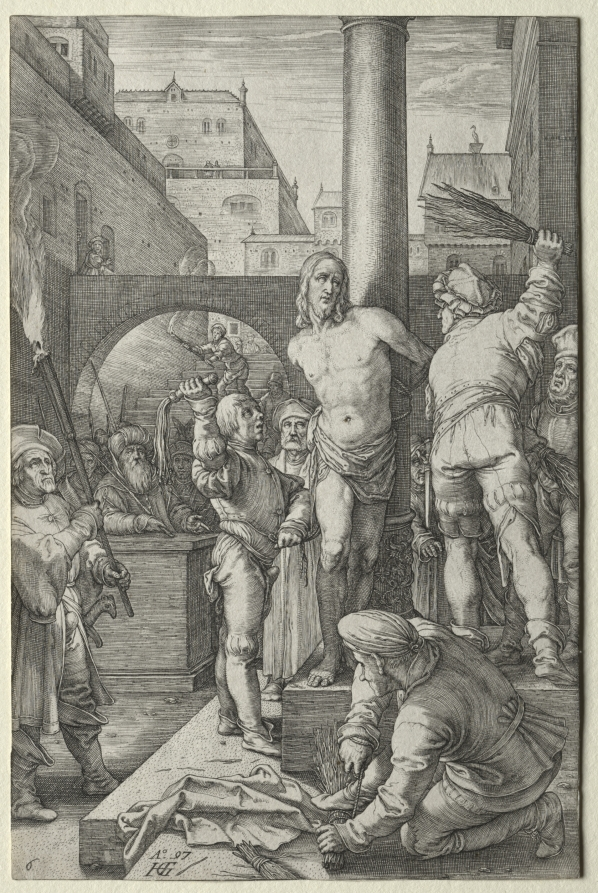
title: The Passion: The Flagellation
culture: Netherlands, 16th century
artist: Hendrick Goltzius (Dutch, 1558–1617)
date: 1597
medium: engraving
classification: Print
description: Goltzius situates his flagellation scene in an urban setting, rather than an open landscape; the compressed space serves to intensify the action. Bound tightly to a tall column, Jesus is whipped by two men, the one on the left wielding a leather whip tipped with barbs; the one on the right with bundled birch branches. Jesus’s body is powerfully muscled, but his face is anguished and gaunt. This engraving was included in a series of 12 prints by Goltzius illustrating the Passion of Christ, extremely popular during the artist’s lifetime and beyond, and inspiring many copies.